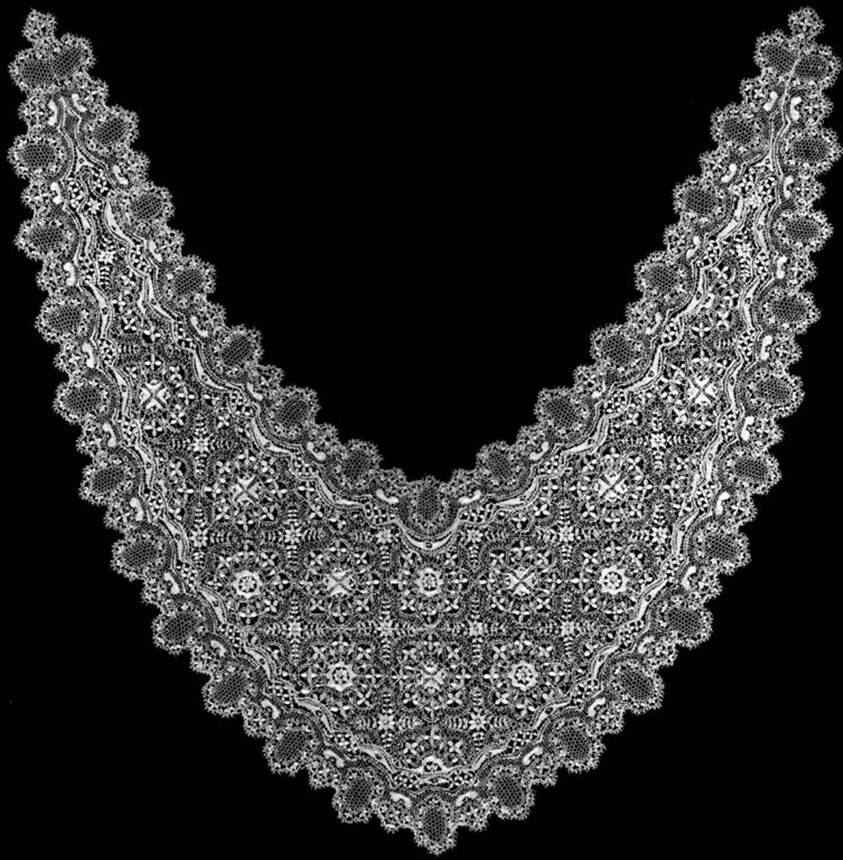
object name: Textile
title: Collar and Handkerchief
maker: Malta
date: 1875/1900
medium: Silk, bobbin straight lace (in strips); b: silk, plain weave; edged with silk, bobbin straight lace (in strips)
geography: Malta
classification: textile; lace - bobbin; lace